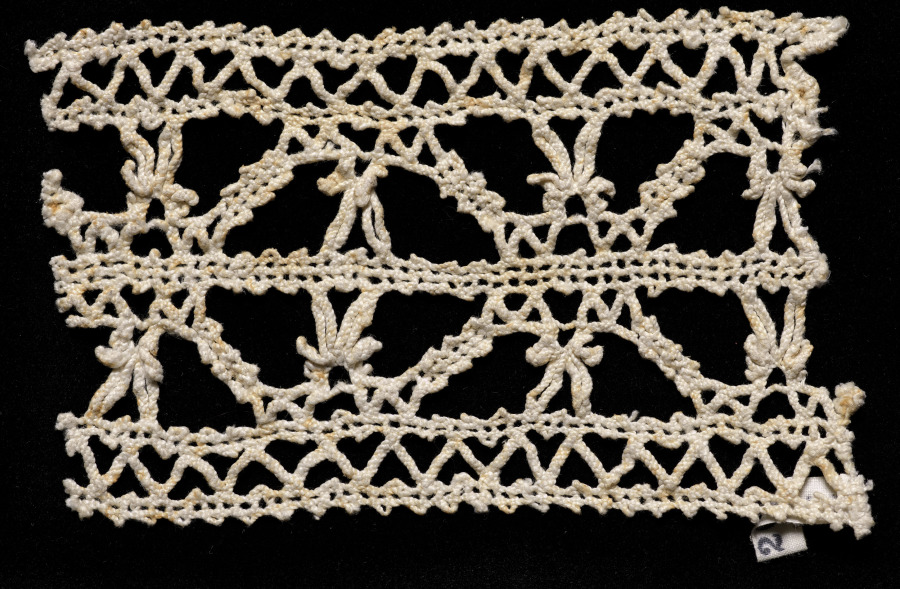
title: Lace Insertion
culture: Italy, Venice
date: 1540–60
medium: Bobbin lace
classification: Lace